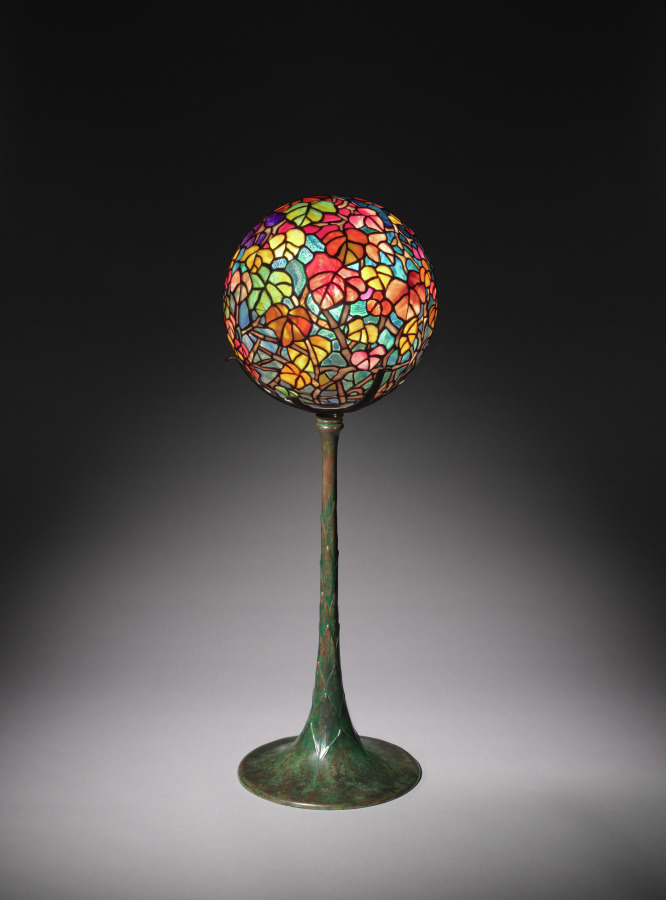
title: Autumn Leaf Globe Table Lamp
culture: America, New York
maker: Tiffany Studios (United States, New York, 1902–32)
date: c. 1905–10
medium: Leaded glass, bronze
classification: Lamp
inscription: Base impressed: TIFFANY STUDIOS/NEW YORK/438/S1339/666 [scratched]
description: Louis Comfort Tiffany was among those who championed lush, sometimes wild-looking displays of varied species in the garden at his Long Island estate, Laurelton Hall. He encouraged his designers to take inspiration from his garden by shipping fresh cuttings almost weekly to his studios. Ohio native Clara Wolcott Driscoll and her team of female designers created floral and leafy patterns for lamps and mosaics that became among the most sought after and commercially successful of Tiffany’s production.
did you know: The globe-shaped shade on this lamp was also sold as a hanging ceiling pendant.